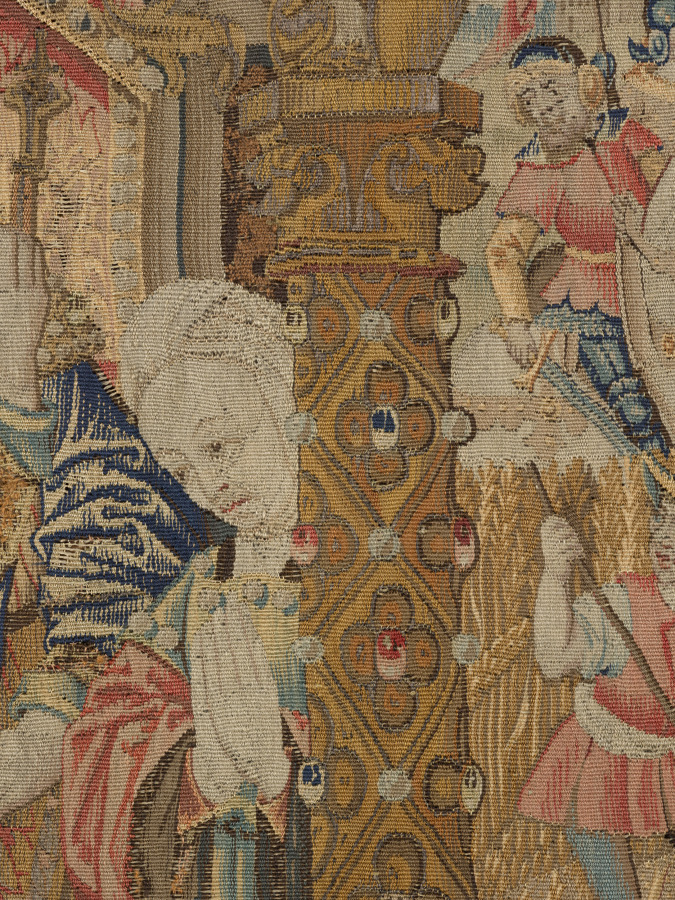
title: Altar Frontal: Scenes from the Childhood of Christ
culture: France and South Netherlands, 1500s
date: c. 1500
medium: Wool, silk, gold thread; tapestry weave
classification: Tapestry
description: Pictorial tapestries were symbols of wealth and more highly prized than paintings. Small tapestries with Christian imagery were frequently commissioned to embellish the fronts of altars. This example displays the Massacre of the Innocents, the Flight into Egypt, and Christ among the Doctors. Tapestry weave is ideal for creating narrative scenes. The technique can be compared to painting, as each colored weft (horizontal thread) is interlaced with warps (vertical thread) where needed for the pattern. As expensive investments, tapestries have the advantage of being portable and easily stored and displayed.